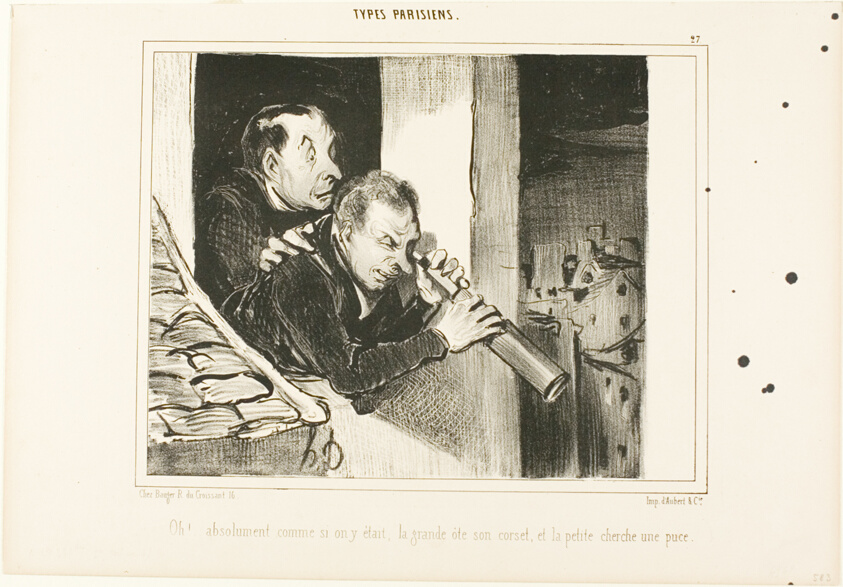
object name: Print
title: "Oh! It is as if we were there: the tall one opens her corset and the little one is looking for a flea!," plate 27 from Types Parisiens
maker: Honoré Victorin Daumier; French, 1808-1879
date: 1840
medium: Lithograph in black on white wove paper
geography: France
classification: lithograph; print; prints and drawing